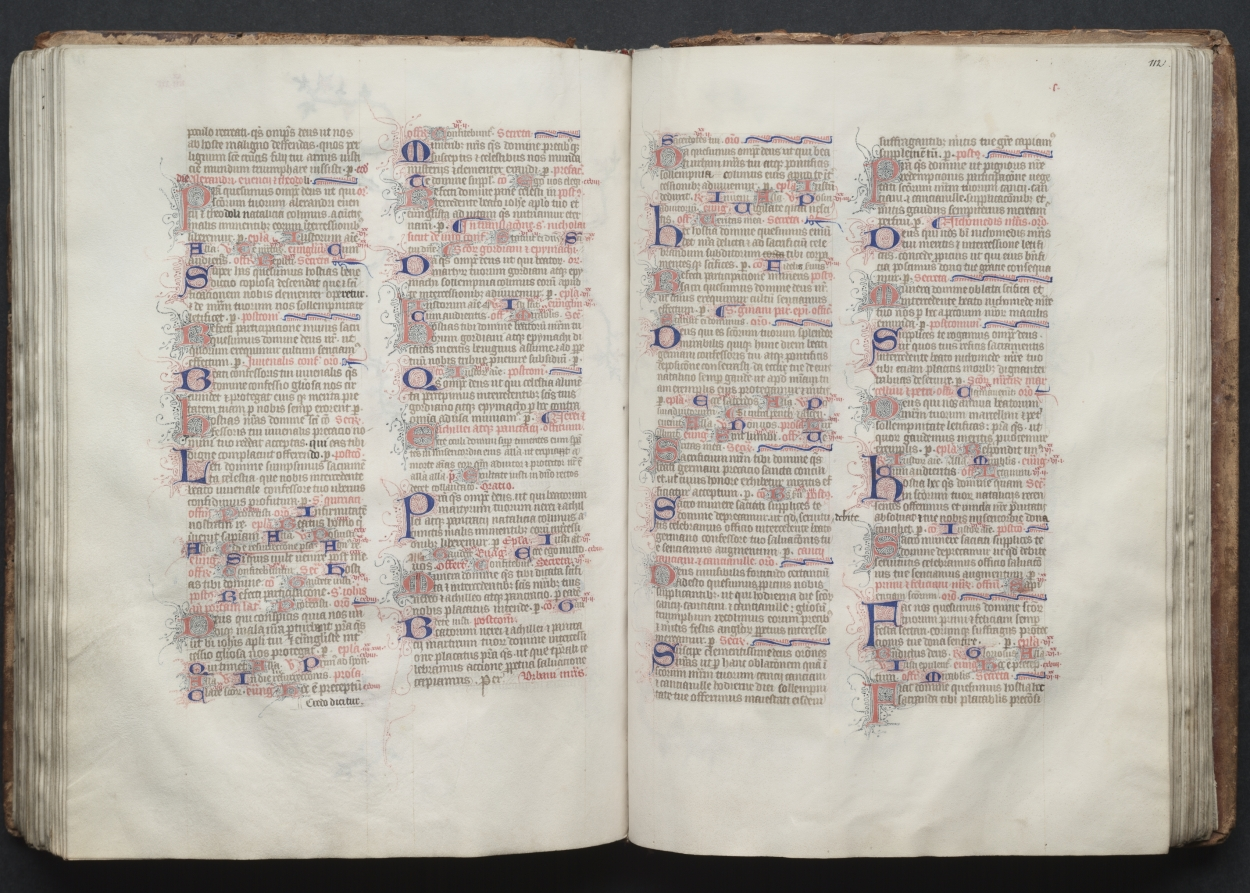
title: The Gotha Missal: Fol. 112r, Text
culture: France, Paris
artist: Master of the Boqueteaux (French)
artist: and Workshop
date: c. 1375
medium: ink, tempera, and gold on vellum; blind-tooled leather binding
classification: Bound Volume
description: The style and quality of this manuscript's decoration is typical of deluxe Parisian books made for aristocratic or royal patrons. Most of the book's decoration appears to be the work of the Master of the Boqueteaux, an artist active at the court of King Charles V (died 1380). His style was apparently shared by a number of book illuminators working in and around Paris. It is very possible that the Gotha Missal belonged to Charles V, but is not provable because the manuscript has no royal portraits and lacks a colophon. Given the book's magnificent decoration, however, it would seem that it was produced for a Valois prince, if not for the king himself. The manuscript receives its name from the German dukes of Gotha, its later owners.